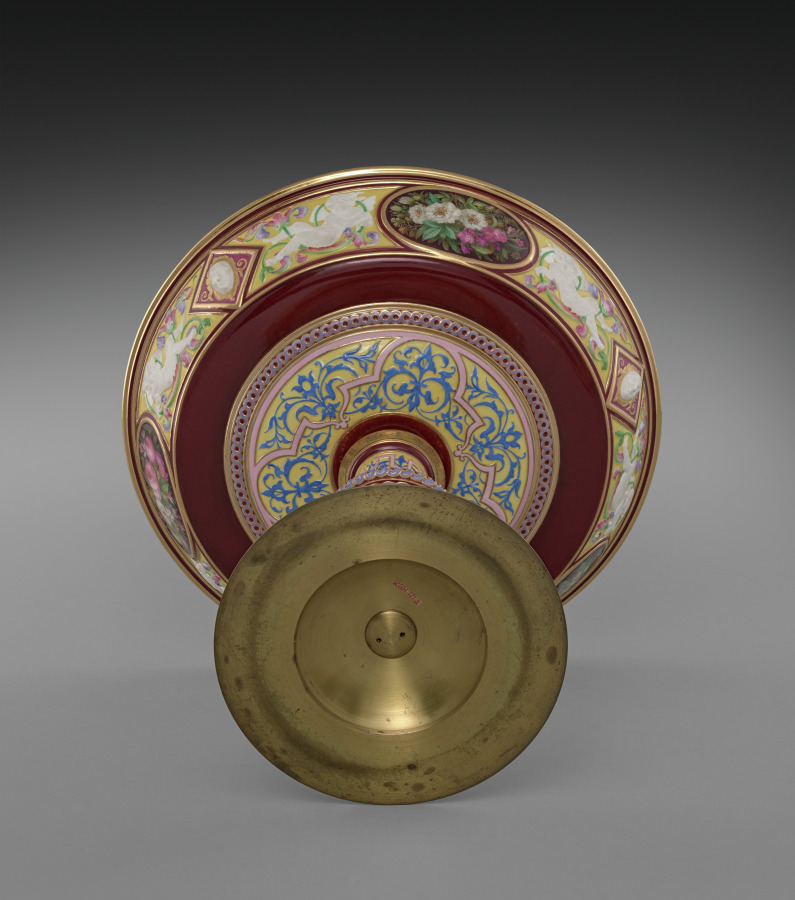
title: Standing Cup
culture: France, Sèvres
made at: Sèvres Porcelain Factory (French, est. 1756)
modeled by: Hyacinthe-Jean Regnier (French, 1803–1870)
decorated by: Francois-Hubert Barbin (French, 1786-)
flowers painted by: Jacques-Nicolas Sinsson (French)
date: 1844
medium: porcelain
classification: Ceramic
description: The official French porcelain factory at Sèvres has always been one of Europe's most important ceramic manufacturers, famous for its decorative pieces as well as more utilitarian wares. This vase in the Renaissance style, its design inspired by 16th-century French examples, is clearly in the tradition of elaborately conceived and decorated pieces intended for use by the French court or as presentation pieces by its monarchs. The latter was the fate of this Covered Cup, acquired in 1846 by Queen Marie-Amélie d'Orleans, the wife of Louis-Philippe, king during the July Monarchy (1830-48). Soon thereafter the vase was presented to a now unknown person. It is one of four pieces of this design made at the Sèvres factory, and the only one known today to have survived.